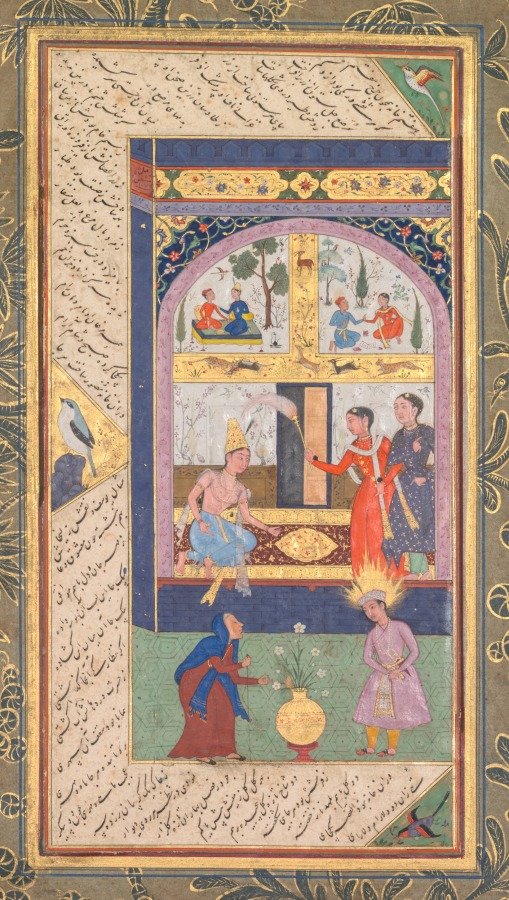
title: Zulaykha in her palace and as an elderly woman with Joseph (recto), from a Panj Ganj (Five Treasures) of Abd al- Rahman Jami (Persian, 1414–1492)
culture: Western Afghanistan, Herat (text); Mughal India (paintings)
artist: Mushfiq (Indian, active early 1600s)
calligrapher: Sultan 'Ali al-Mashadi (Iranian, 1430–1520)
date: 1603–7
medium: Gum tempera, ink, and gold on paper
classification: Painting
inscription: [[Upper left of painting, against a red background, in nasta’liq script]] ' amal - i Mushfiq sana 1015 Text on verso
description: The golden pot of white narcissus flowers at the bottom center of the painting signals that Zulaykha, leaning on her staff to the left, will imminently have her youth and beauty restored. In this Persian retelling of the Old Testament account from the Bible, Zulaykha lusted after Joseph, even though she was already married to Potiphar. Joseph, with the golden halo, resisted her advances until she became a widow and retained his youth, because of his extreme virtue. Above, Zulaykha as a young woman waits for Joseph in her house where murals of them as a happy couple are painted on the walls.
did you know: Zulaykha is shown four times: twice in the murals, seated in the center, and below when she is much older.